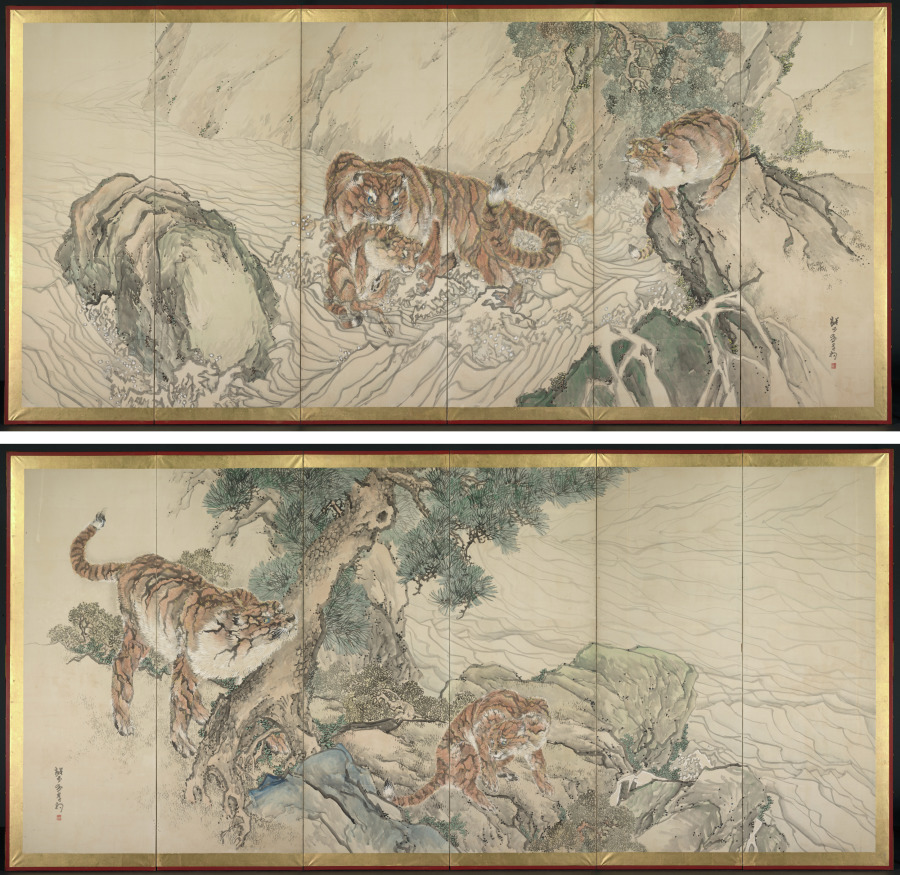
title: Tiger Family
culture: Japan, Edo period (1615–1868)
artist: Kishi Ganku (Japanese, 1749/56–1838)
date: early 1800s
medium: Pair of six-panel folding screens; ink and color on paper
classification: Painting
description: By the time this self-taught painter reached his thirties, his paintings were keenly sought after by Kyoto’s sophisticated patrons, including members of the imperial family. Judging from the surviving works, his supporters delighted in the colorful, auspicious imagery of Chinese historical figures, blossoming plum trees, cranes, peacocks, roosters, and especially tigers. Kishi Ganku was originally from the coastal town of Kanazawa, but relocated to Kyoto to work for the Arisugawa family. His work incorporates stylistic elements from the Kano school, the Maruyama school, and works by the Chinese artist Shen Nanping (1682–1760).